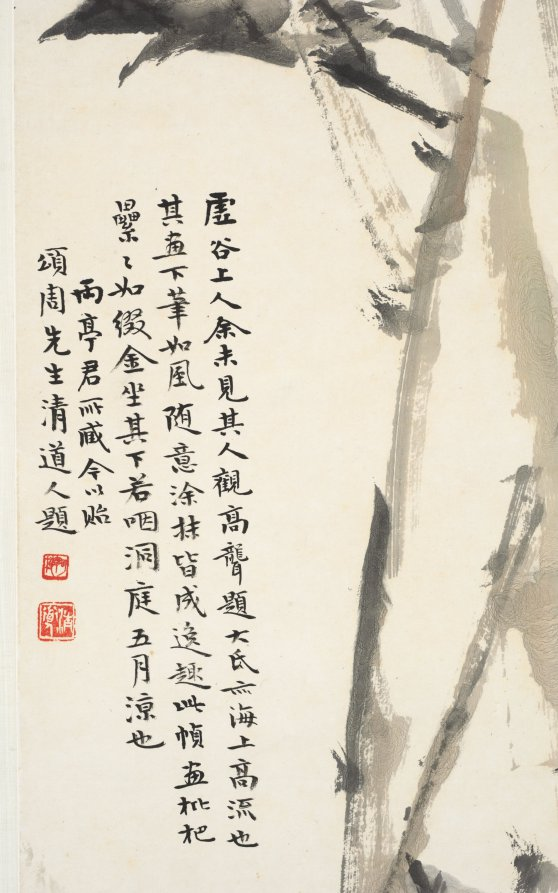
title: Pipa (Loquats)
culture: China, Yangzhou, Qing dynasty (1644-1911)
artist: Xugu (Chinese, 1823–1896)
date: c. 1888–89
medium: Hanging scroll; ink and color on paper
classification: Painting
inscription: 友山仁兄大人屬即教之，虛谷. [印]虛谷書畫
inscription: 未接虛公一經書2，夜臺畫興近何如。/ 聾丞今日狂談藝，更有誰人能起予。 雨亭以友山所貽虛谷和上畫屬，题於泰山殘石樓中，戊戌三日二十日，高邕并記。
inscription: 虚谷上人，余未見其人。觀高聾題大氏，亦海上高流也。其畫下筆如風，隨意涂抹，皆成逸趣。此幀畫枇杷纍纍如缀金，坐其下若咽洞庭五月涼也！ 雨亭君所藏，今以貽頌周先生。清道人題。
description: The loquat is a plant native to China that produces a juicy, yellow fruit in early summer. The artist may have intentionally extended the branches beyond the paper to emphasize the abundance of fruit. Xugu’s subjects of flowers, goldfish, and loquats express wishes for abundance and wealth, and must have appealed to his patrons. Xugu gave up his career as a military official during the Taiping rebellion (1850–64) and became an itinerant monk who painted for a living. He spent the later years of his life in Shanghai and his fame as an artist is associated with that city.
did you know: Xugu inscribed his painting on the right, dedicating it to a Mr. Youshan. Two additional inscriptions by other writers were added later, each time the painting changed owners.